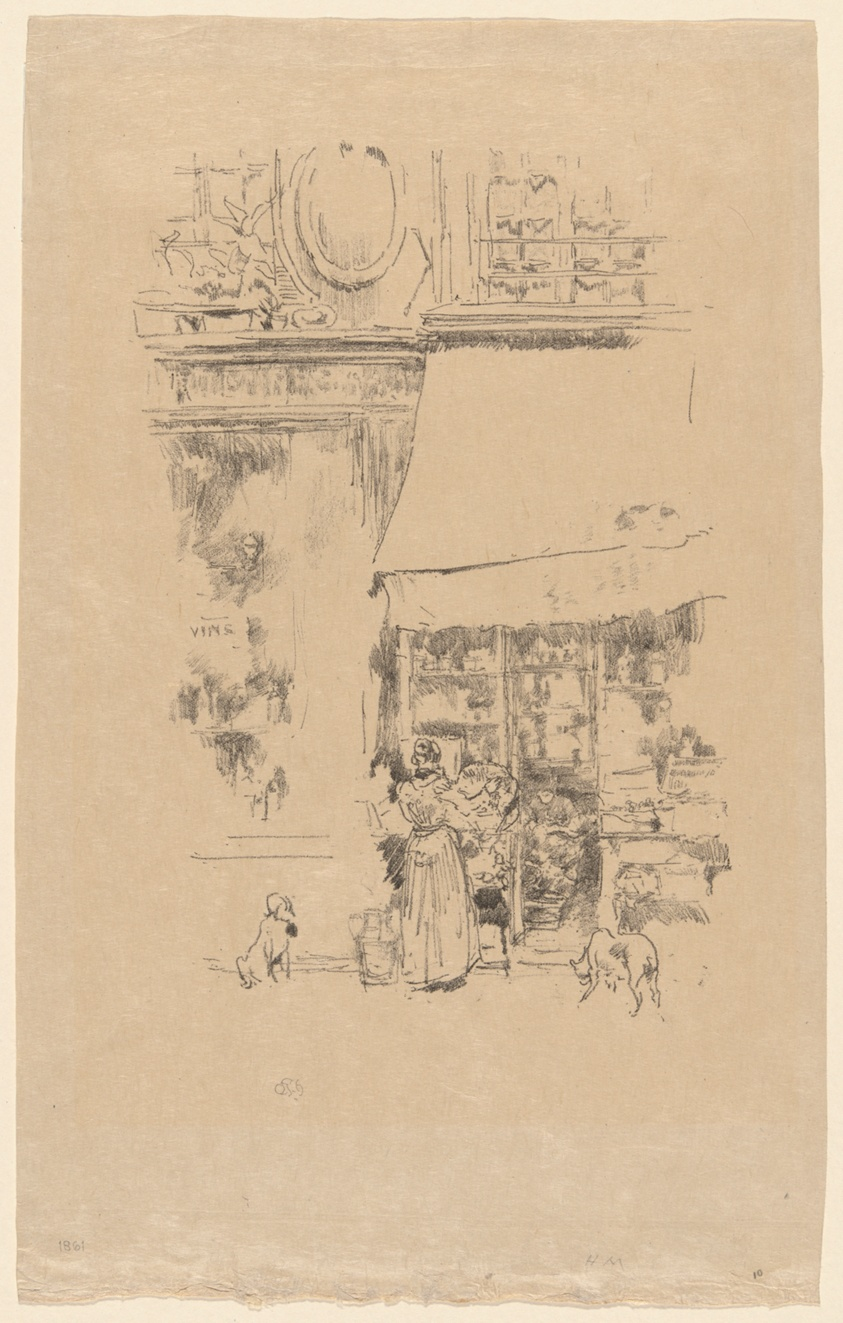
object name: Print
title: La Fruitière de la rue de Grenelle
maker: James McNeill Whistler (American, 1834-1903)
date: 1894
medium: Transfer lithograph in black on cream laid Japanese vellum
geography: United States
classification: transfer lithograph; lithograph; print; prints and drawing